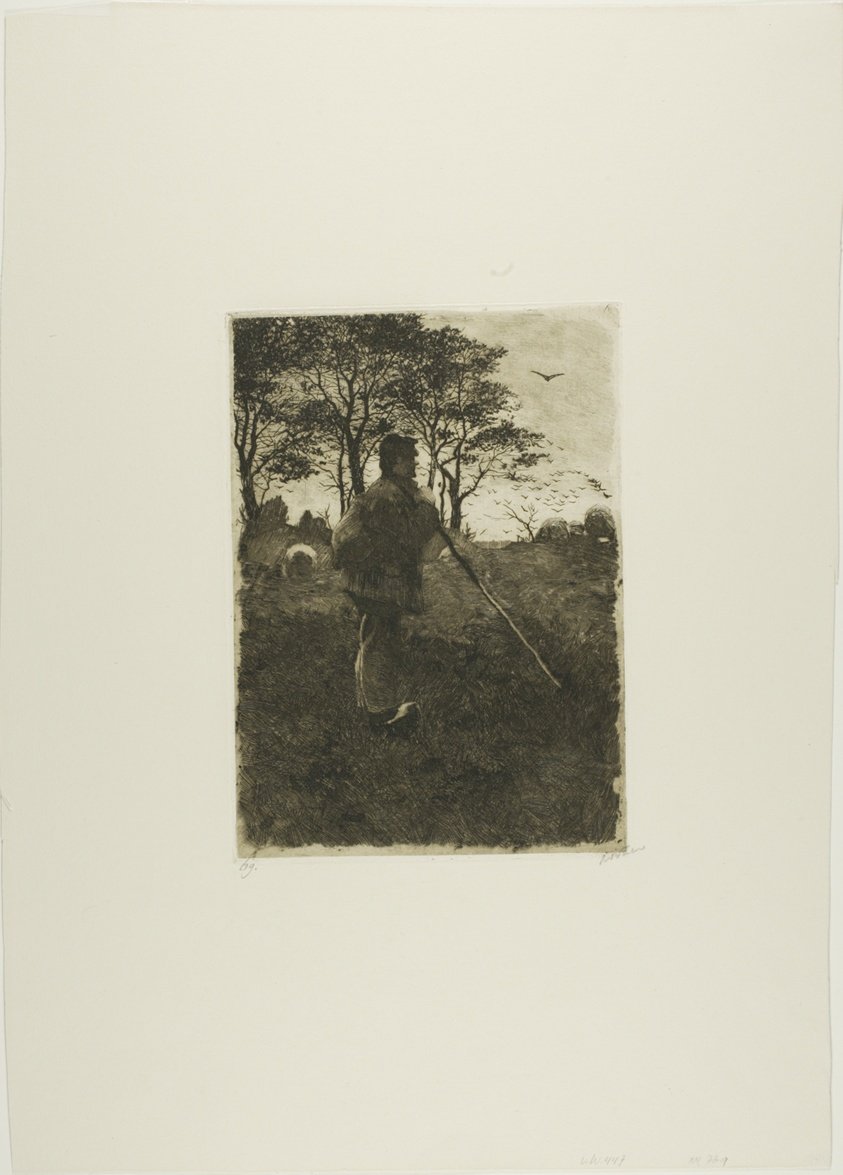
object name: Print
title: Sheepherder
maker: Willem Witsen (Dutch, 1860-1923)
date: c. 1885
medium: Etching in dark brown on cream laid paper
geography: Netherlands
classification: etching; prints and drawing; print